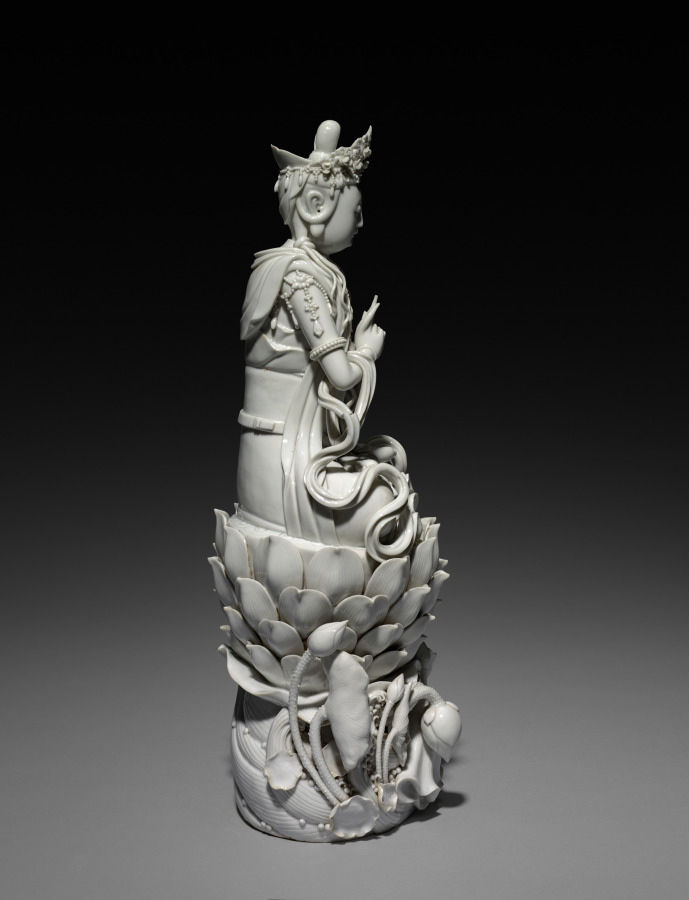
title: Bodhisattva Guanyin of the South Sea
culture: China, Fujian Province, Ming dynasty (1368-1644) - Qing dynasty (1644-1911)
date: 1600s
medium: Porcelain with white glaze, Dehua ware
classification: Ceramic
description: Guanyin, the Buddhist bodhisattva of infinite compassion (Avalokiteshvara in Sanskrit), is the most revered enlightened being in East Asia. The bodhisattva perceives all beings in need of help and reveals himself in many forms. Here, his elaborate lotus pedestal rests on the crest of surging waves, identifying him as Guanyin of the South Seas. The Dehua kilns in Fujian province in southern China produced white porcelain figures for both the domestic and export markets. In China, such a figure may have furnished a house altar or a temple.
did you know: When Marco Polo visited China in the late 1200s, he was so impressed by the Dehua kilns that he included lengthy descriptions of ceramic production in his chronicle of his journey.